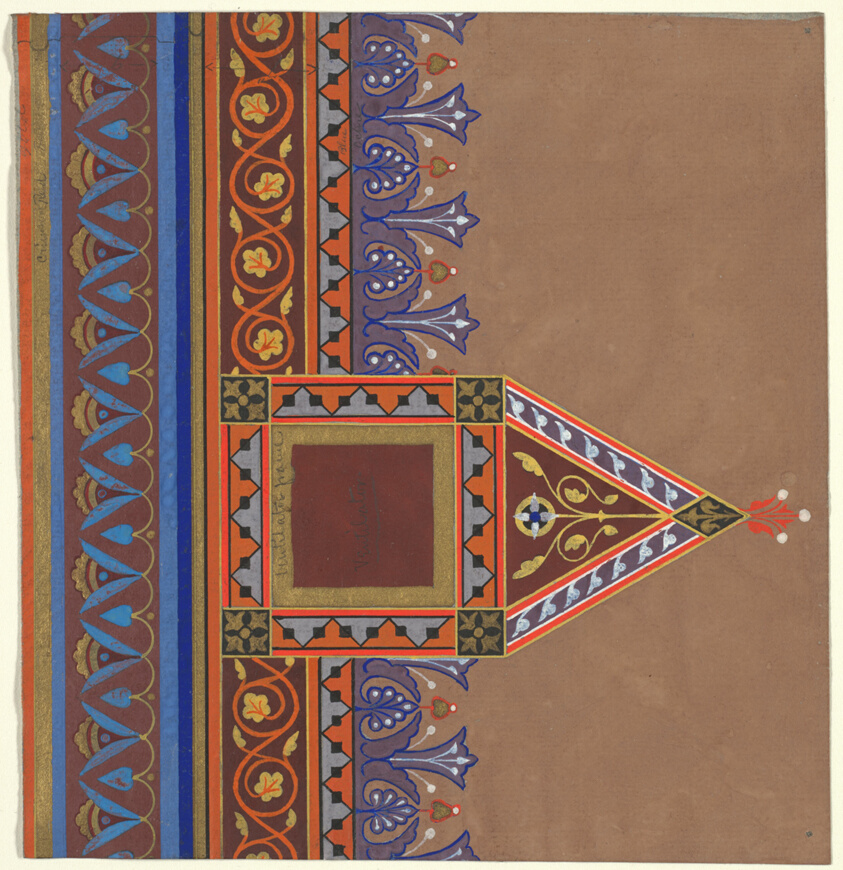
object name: Drawing and Watercolor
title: Brooklyn Library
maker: Wight, Peter Bonnett; American, 1838-1925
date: 1868/69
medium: Pencil and gouache on paper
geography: United States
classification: drawings (visual works)